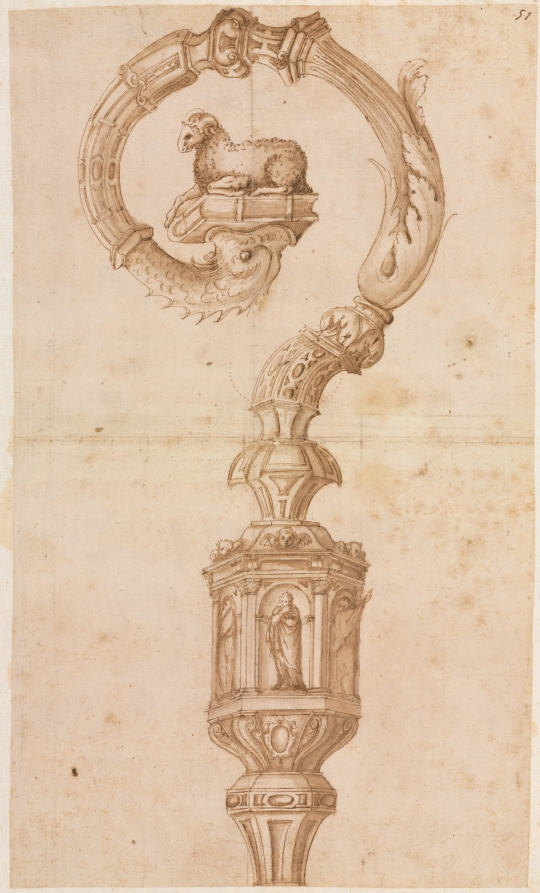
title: Design for a Crozier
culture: Italy, 16th century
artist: Luzio Romano (Italian, active 1528–75)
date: mid 1500s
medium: pen and brown ink and brush and brown wash; pricked (bottom half)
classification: Drawing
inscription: upper right, in brown ink: 51 ; RECTO OF SECONDARY SUPPORT, upper right, in black chalk(?): 79 ; lower right, in graphite: [erased] ; lower right, in graphite: 19 [underlined] ; VERSO OF SECONDARY SUPPORT, lower right, in graphite: A 3106